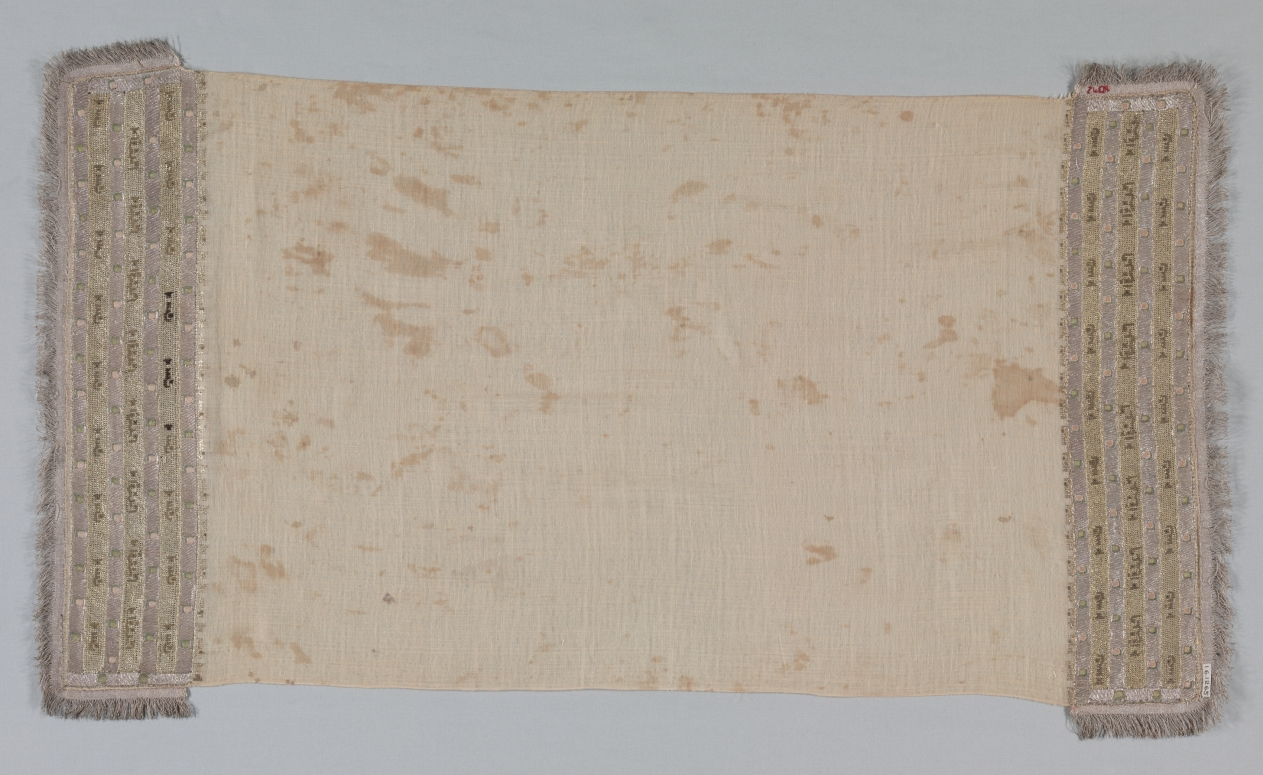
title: Embroidered Towel (Peshkir)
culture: Turkey, 19th century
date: 19th century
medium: embroidery: silk and gold and silver filé on cotton tabby ground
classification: Embroidery